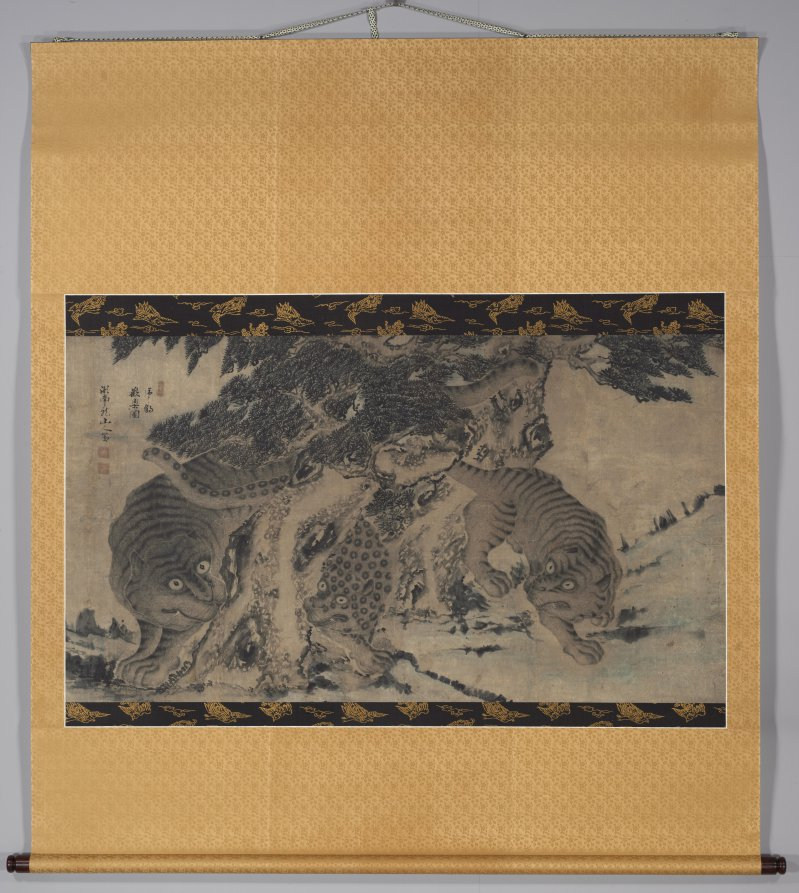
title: Tigers and Leopard Frolicking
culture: Korea, Joseon dynasty (1392–1910)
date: 1700s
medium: Hanging scroll; ink on paper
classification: Painting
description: This monochrome composition depicts a tiger and her young playing at stalking one another in a stand of pine. Tigers, considered messengers of mountain spirits, and are often paired with leopards, mistakenly thought to be baby tigers. The signature written at the upper left of the painting reads "The mountain recluse of Honam," possibly referring to a painter from Jeolla province in Korea.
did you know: Korean artists during the Joseon dynasty (1392–1910) often described leopards as baby tigers, explaining why in this painting tigers and leopards are shown together as a family.